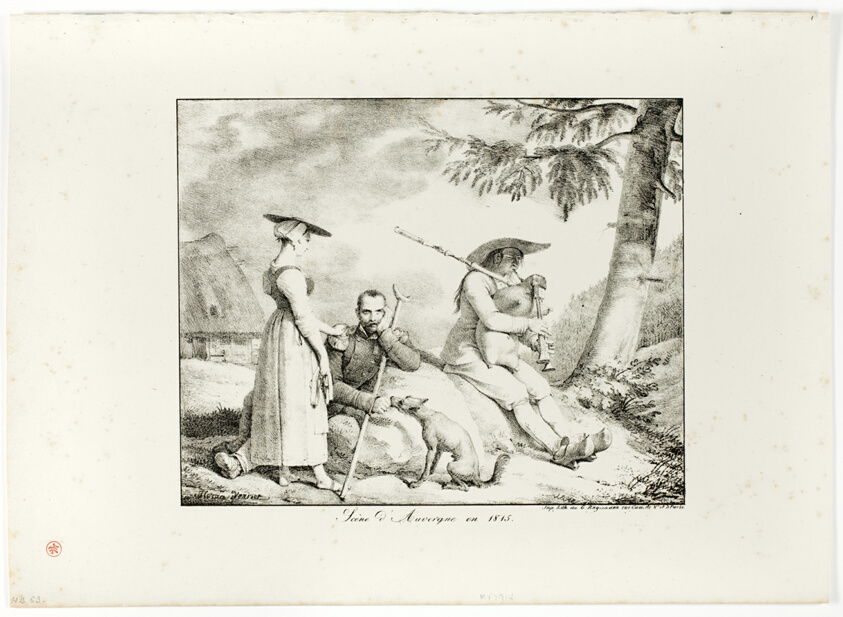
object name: Print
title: Scene d’Auvergne en 1845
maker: Horace Vernet (French, 1789-1863)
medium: Lithograph in black on ivory wove paper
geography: France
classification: lithograph; print; prints and drawing